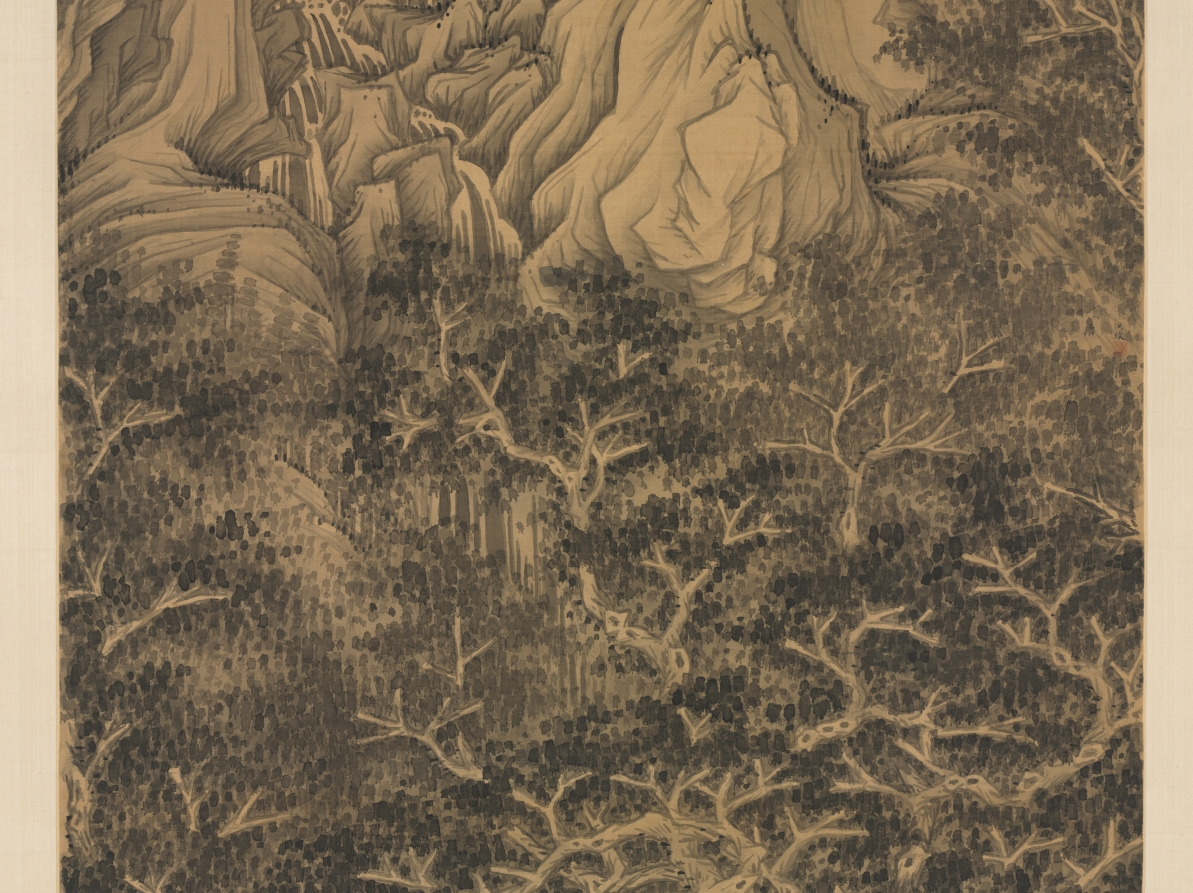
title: The Mountain of Five Cataracts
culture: China, Ming dynasty (1368–1644)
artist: Chen Hongshou (Chinese, 1598/99–1652)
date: c. 1630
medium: hanging scroll; ink on silk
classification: Painting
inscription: Artist's signature and seal at middle right edge: Hongshou [seal] Zhanghou 洪绶 [印]章侯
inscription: Inscription by Gao Shiqi 高士奇 (1645–1704): The Mountain of the Five Cataracts is bordered by three prefectures--Wu [Jinhua], Hang [Hangzhou], and Yue [Shaoxing]--and is quite close to Jiyang [Zhuji] in Yue. The landscape there is extraordinary and precipitous, with ridges and peaks standing in circles. Rocks of strange shapes gaze down everywhere, while maple and bamboo provide shade. The water from five pools overflows and is suspended in five steps--that is why it is called "Five Cataracts." Xie Yuanqing [Xie Tiao 謝朓, c. 464–499] of the Qi Dynasty gathered medicinal herbs here; Diao Jingchun [Diao yue 刁約, 11th century] of the Song Dynasty also visited here; Song Jinhua [Song Lian 宋濂, 1310–1381] and Xu Tianchi [Xu Wei 徐渭, 1521–1593] both wrote travel notes about the place; and Chen Hongshou painted here. His mountains are done in the style of the Six Dynasties masters; the trees are after those of Dong Beiyuan [董源 Dong Yuan, active during the Five Dynasties]--the painting seems to be richly imbued with the primeval spirit. Xu Wei said that the grotto is unique for the shade (yin) and the five cataracts unusual for the sun (yang). There are seventy-two peaks, with a ravine between two cliffs. At times they are bright and at other times, gloomy; sometimes they seem to be open, sometimes closed, yet often border uniquely between shady (yin) and sunny (yang). Zhanghou [Chen Hongshou] really succeeded in capturing that spirit. As a young man indulgently boating through Shanyin [Shaoxing],/ I became familiar with the beauty of the Five Cataracts./ The cold streams, when level, become pools clear as crystal./ Pouring foam mingled with flying waterfall,/ Its shapes constantly changing./ Water would flow downward without a sound,/ Or become raging billows emitting echoes./ Sometimes the wind from the sky would wail,/ The green forest during the day would turn dark./ Sometimes it was dangerous and difficult to ascend,/ For the moss was slippery on the stone steps in those precipitous cliffs./ After reading the travel notes of Sung [Lian] and Xu [Wei],/ I'm afraid their descriptions are incomplete. / Yet when Laolian [Chen Hongshou] was seized with the inspiration to paint,/ His brush and ink moved with exhilaration./ It is as if mists have risen/ From a hot cooking pot, gradually opened./ By hanging this on a plain wall,/ One can clearly listen to the quiet night./ At the end of the year, ice and snow are deep;/ The cold air in the quiet studio is frozen./ Near the fireplace, I make with it a silent, spiritual acquaintance/ Burning incense and striking a lucid qing [stone chime]. On the eighteenth day of the twelfth month in the jimao year of the Kangxi era [1699]. Jiangcun, Gao Shiqi. Zhuchuang inscribed this at Zhe in the Lan Jing studio. It was the third day after the beginning of spring. trans. LYSL/HK/WKH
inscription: Collector's inscription by Gao Shiqi 高士奇 (1645–1704), one column in standard script at the lower left corner: 信天巢秘藏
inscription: 5 seals of Gao Shiqi 高士奇 (1645–1704): 竹窗 Zhu Chuang; 高士奇 Gao Shiqi; 澹人 Danren; 簡靜齋 Jian Jing Zhai (Gao Shiqi's studio; at the upper left corner); 高氏江村草堂珍藏書畫之印 Gaoshi Jiangcun Caotang Zhencang shuhua zhi yin (at the lower left corner).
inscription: Two additional seals at the lower left and right corners are undecipherable.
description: A unique landscape painting in the existing body of Chen Hongshou’s art, this painting reveals his involvement with the practice of fang (imitation) to achieve creative transformation. Chen acquired the tradition stemming from Dong Yuan of the Five Dynasties, with which he sought an artistic individuality that lends his work an idiosyncratic vision and extraordinary power.